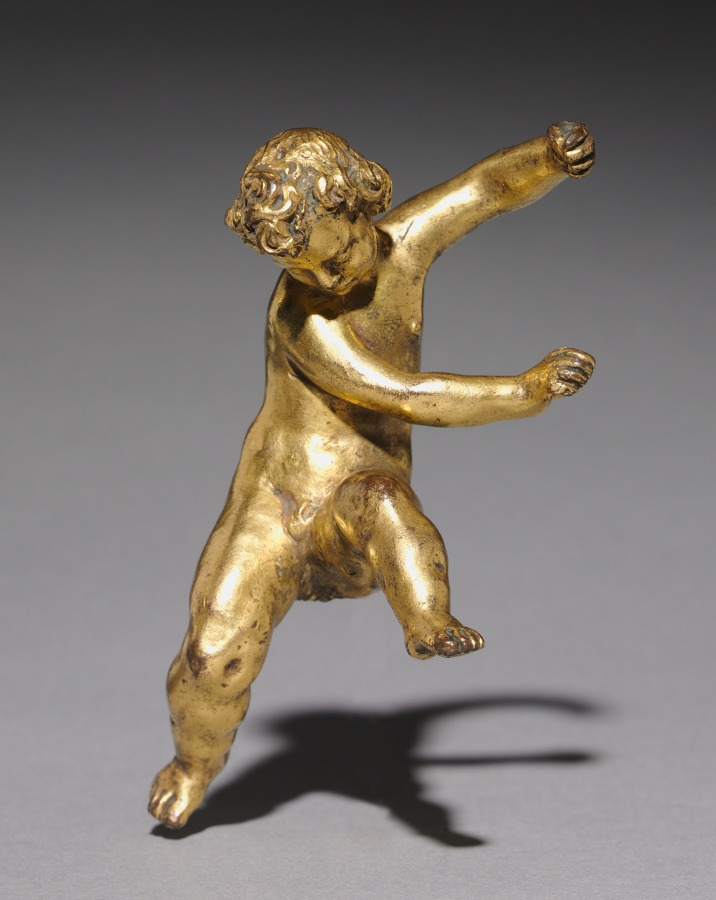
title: Pair of Putti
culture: Italy, Rome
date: late 1500s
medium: gilt bronze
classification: Sculpture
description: These gilt bronze putti, or figures of plump male children in the nude, are near mirror images of one another. Both are seated, with their arms flung to the side. Minimal detailing exists in the hands and feet, with the fingers and toes signified only by simple line indentations. The function and original placement of the putti is uncertain, but their posture and the placement of their hands suggest that originally they may have been placed in a larger statue group, perhaps holding either side of a banner, or even a piece of furniture. A will drawn up by Guglielmo della Porta in 1558 mentions the existence of bronze Passion scenes and crucifixes, suggesting that the artist may have created other small bronze groups as well. John Pope-Hennessey attributed these works to della Porta based on their similarity to the figures of Apollo and Artemis in Latona and her Children (Victoria and Albert Museum, London) and the monumental putti in his Tomb of Cardinal Paolo Cesi in Santa Maria Maggiore in Rome, although more recent research points away from della Porta as the maker. Ana Dieglio 2009